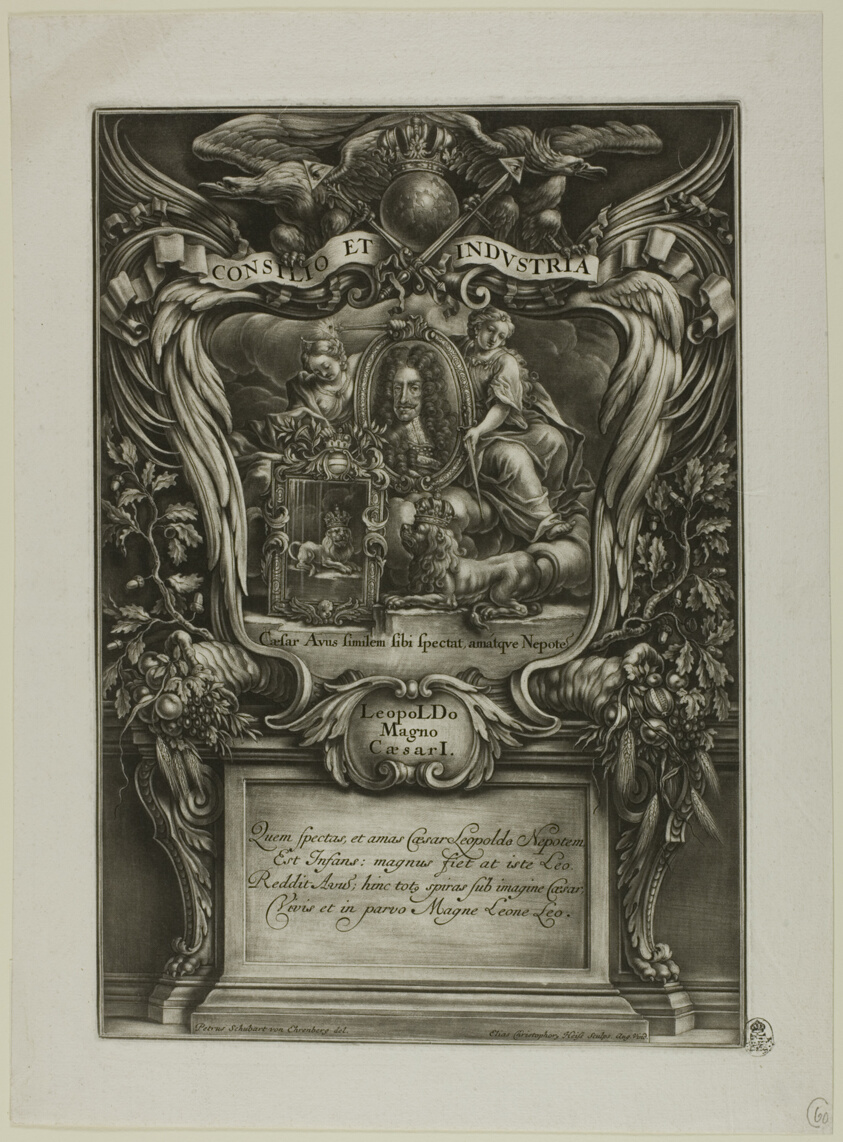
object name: Print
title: Leopoldo Magno, Caesar I, from Triumphus Novem Saeculorum Imperii Romano Germanici Leopoldo Magno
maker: Christoph Elias Heiss (German, 1660-1731)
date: c. 1700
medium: Mezzotint on paper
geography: Germany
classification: mezzotint; print; prints and drawing